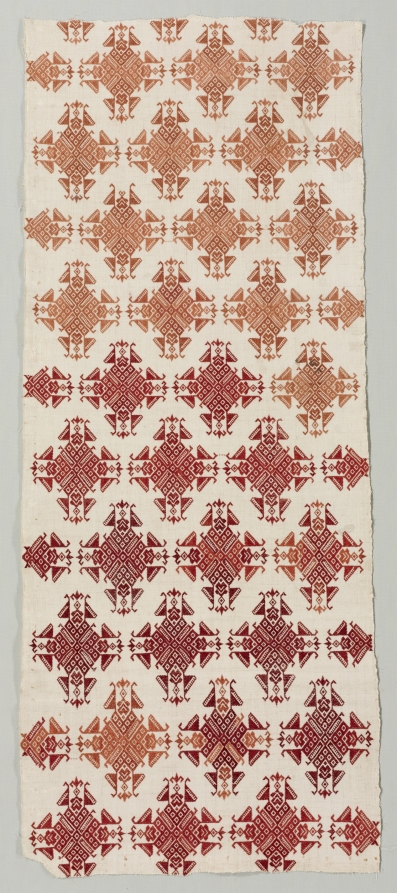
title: Fragment of a Bed Curtain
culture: Greece, Cyclades Islands, Naxos, 19th century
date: 1800s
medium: embroidery: silk on linen tabby ground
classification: Embroidery